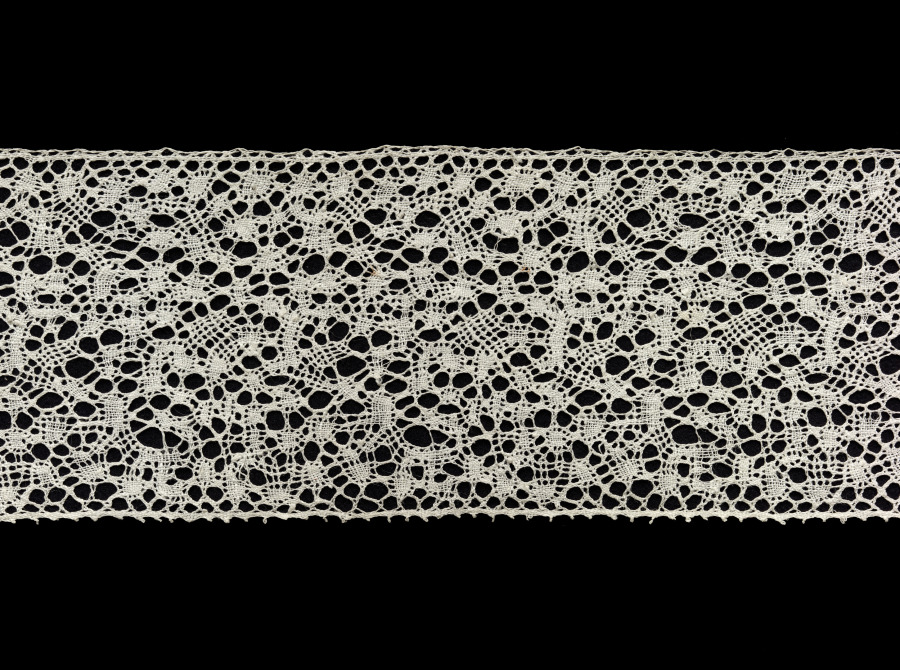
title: Lace Insertion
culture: Belgium, Binche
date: 1700s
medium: Bobbin lace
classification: Lace